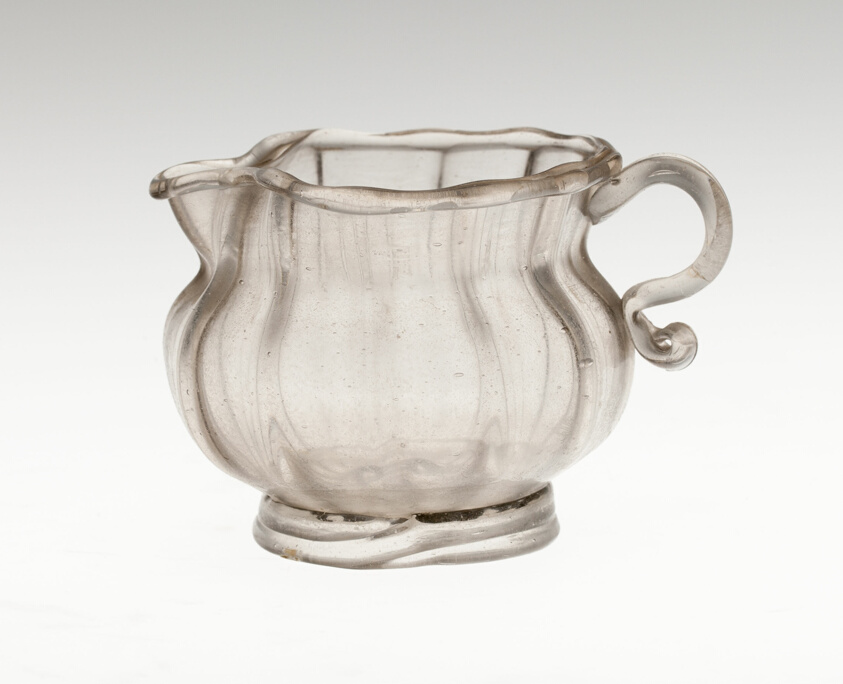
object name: Glass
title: Pitcher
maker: Italy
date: 17th century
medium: Glass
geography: Italy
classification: pitcher (vessel); glass; vessel; european decorative arts